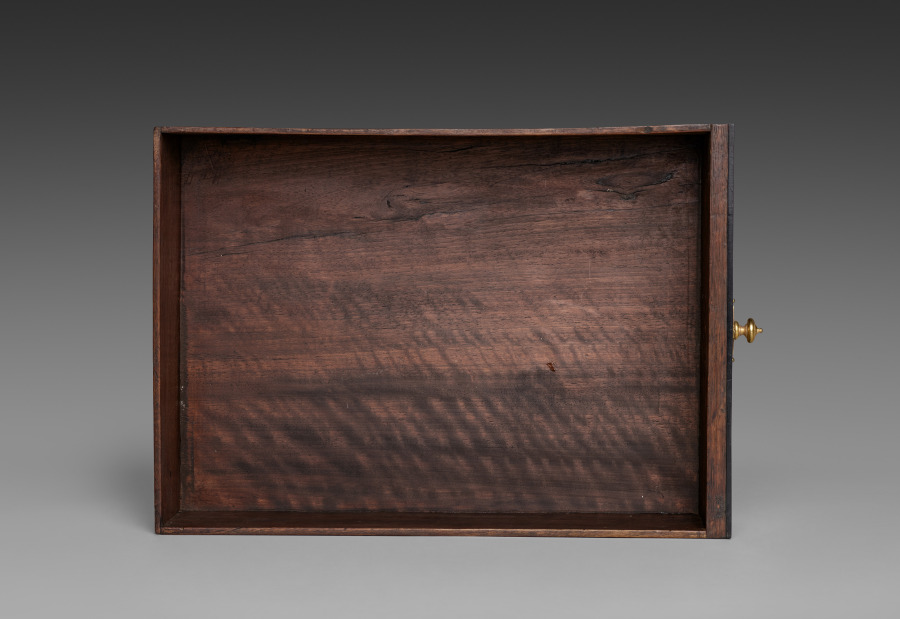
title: Interior Drawer for Cabinet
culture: France, late 17th Century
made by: André-Charles Boulle (French, 1642–1732)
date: c. 1690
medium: ebony, marquetry in metal and tortoiseshell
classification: Furniture and woodwork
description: Appointed cabinetmaker to King Louis XIV in 1672, André-Charles Boulle became a master of furniture making in France during the late 1600s until his death in 1732. Known primarily for his use of marquetry, in which metal patterns are inlaid into tortoiseshell then applied within the veneered surface of the furniture, Boulle established a level of quality and craftsmanship few others could achieve. As a result, his work found favor at the royal court and among other aristocrats and diplomats eager to impress the king. The inclusion of a medallion depicting Louis XIV within the bronze decoration of this chest would have identified the owner with the royal court. Often exhibiting stout architectural proportions with elegant groups of inlaid motifs such as the parrot on the central panel of this chest, Boulle’s designs are an example of the intellectual fashion for contrasting ideas, materials, and motifs.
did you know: Originally designed to sit atop an elaborate tall stand, this chest was likely altered in the late 1700s to reduce its scale and height.